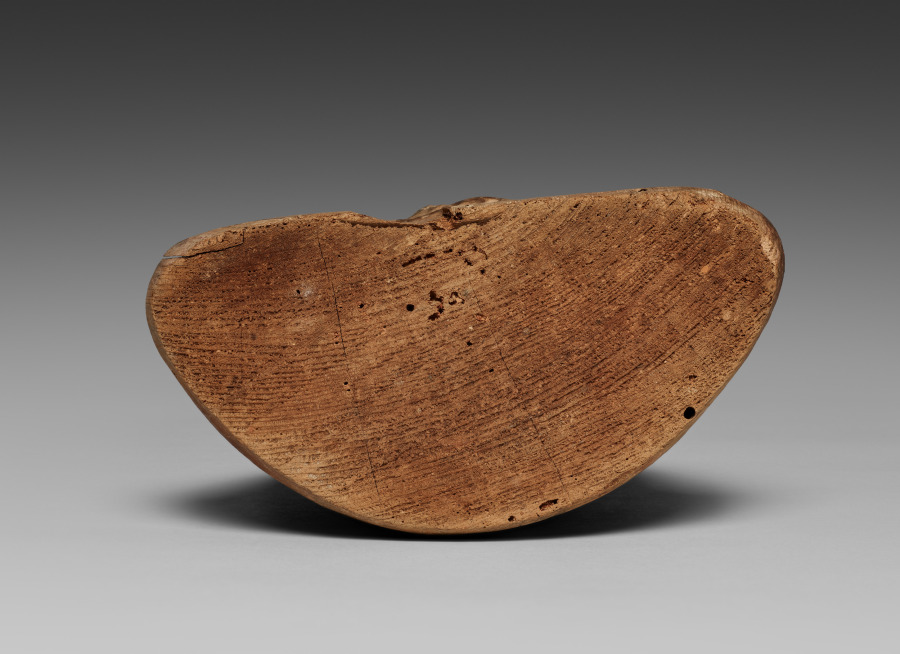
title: Gozu Tennō (Ox-Headed Plague Deity)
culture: Japan, Heian period (794–1185)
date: 1100s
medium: Wood with traces of color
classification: Sculpture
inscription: Object has wood storage box made and inscribed by former owner, sculptor Hirakushi Denchū (1872–1979). Inscription on face of box lid reads: Gozu Tennō sonzō (sculpture of Gozu Tennō [Ox-Headed Deity of Plague] 牛頭天王尊像); inscription on inside of box lid reads: made in the latter part of the Heian period, respectfully inscribed by Hirakushi Denchū [age] 99, February 1970 (平安朝後期作昭和四十五年二月 九十九 平櫛田中 拝題）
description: Gozu Tennō is a deity who is capable of both bringing epidemics and dispelling them. His name is literally “Ox-Headed Celestial King.” He usually has three heads with an ox-head rising above his primary face. He sometimes holds a lasso and sword or an ax, but here holds his hands in a powerful gesture that may be designed to repel illness or promote healing.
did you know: The Gion Festival in Kyoto is related to belief in Gozu Tennō.